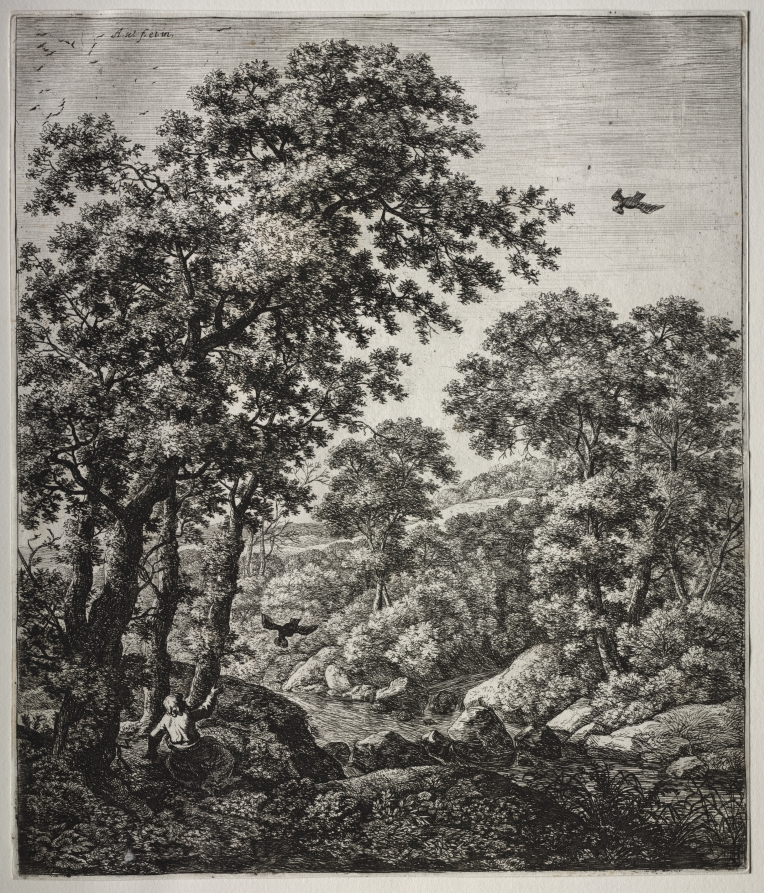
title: Six large upright landscapes with scenes from the Old Testament: Elijah Fed by the Ravens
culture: Netherlands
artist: Anthonie Waterloo (Dutch, 1609/10–1690)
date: 1640–90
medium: etching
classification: Print